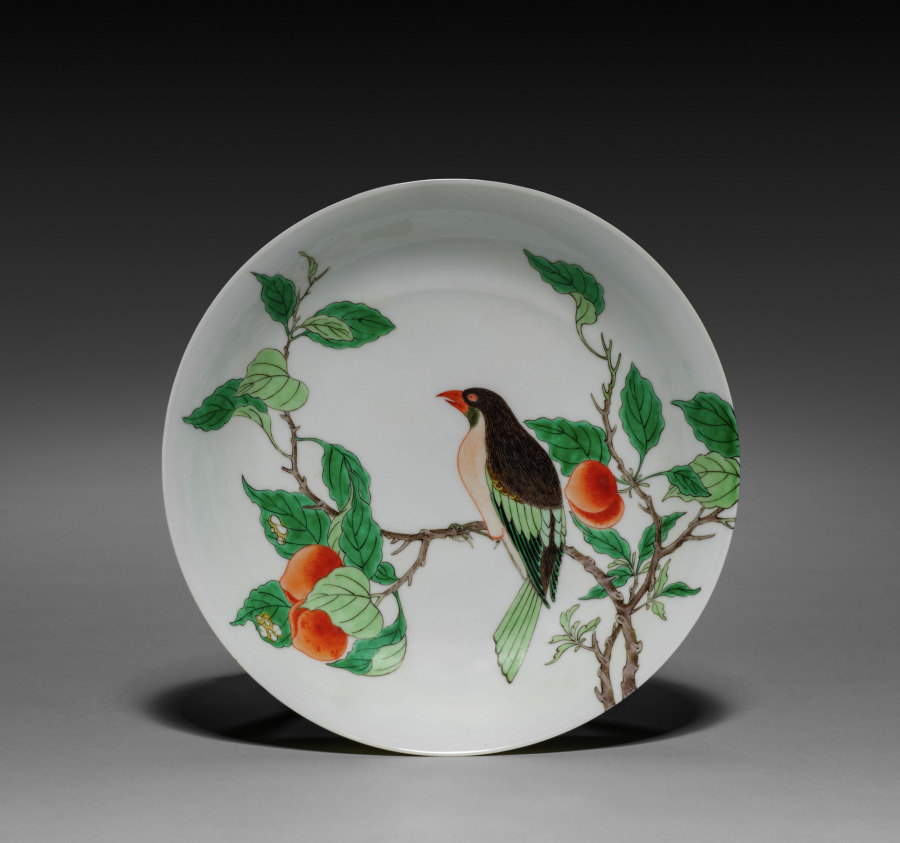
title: Dish with Bird on Fruit Tree Branch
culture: China, Jiangxi province, Jingdezhen kilns, Qing dynasty (1644–1911), Kangxi mark and reign (1662–1722)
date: 1662–1722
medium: Porcelain with famille-verte overglaze enamel decoration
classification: Ceramic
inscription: 大清康熙年制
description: Among the greatest achievements of early Qing porcelain are table wares and display objects decorated with polychrome painting like this pair of dishes. Featuring birds perched in peach trees, the dishes are related to the famous birthday set commissioned for the Kangxi emperor’s sixtieth birthday in 1713. These pieces are more inventive than those in the 1713 set, however, since the unframed ornament is allowed to continue unbroken from the outer to inner surfaces and back out again, thus transforming each vessel into a three-dimensional canvas.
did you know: By the early eighteenth century, the imperial kilns at Jingdezhen were producing exceptionally fine pieces on a staggering scale.